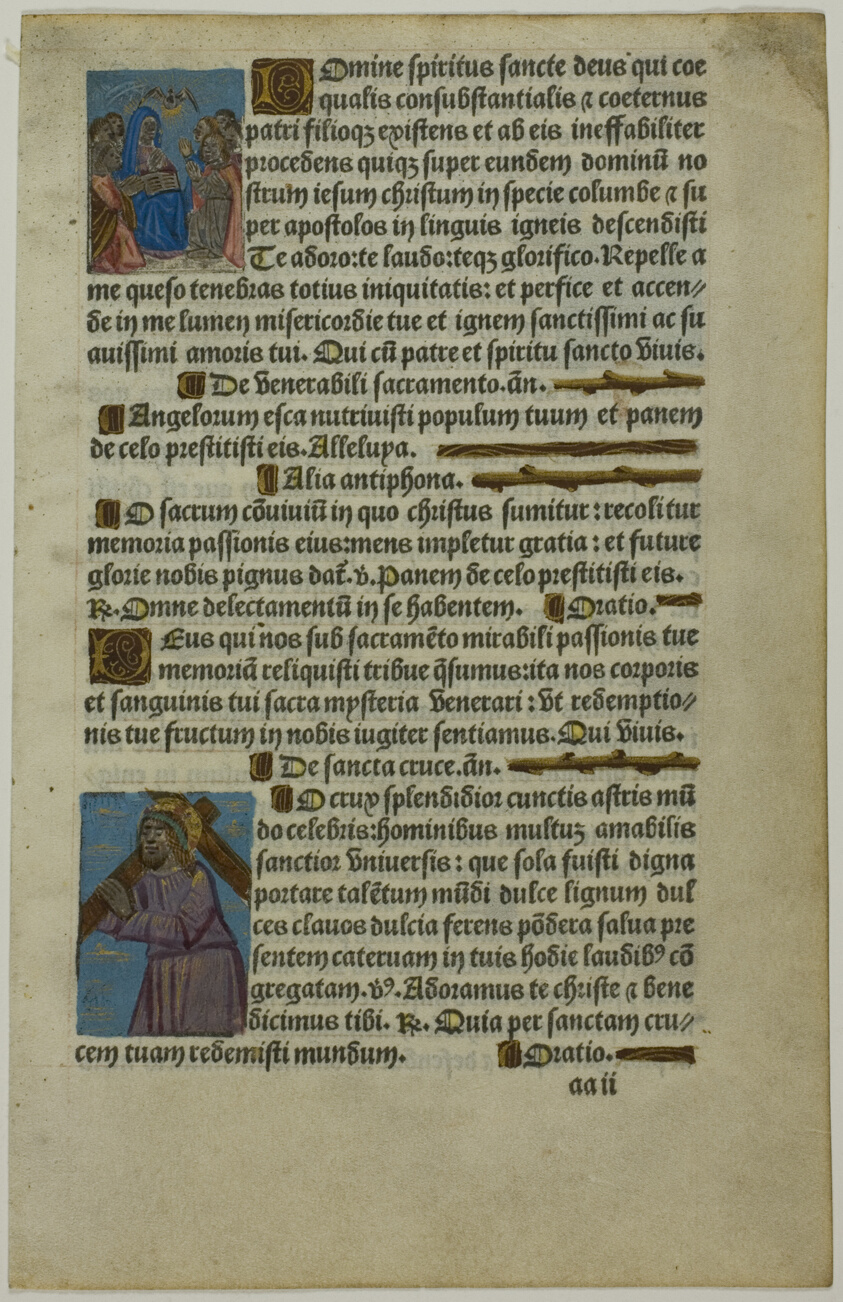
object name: Print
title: Pentecost and Christ Carrying the Cross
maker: Unknown artist (French, active 15th/16th century)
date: c. 1500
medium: Hand-colored woodcuts, with gilding and letterpress, on vellum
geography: France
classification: woodcut; print; prints and drawing